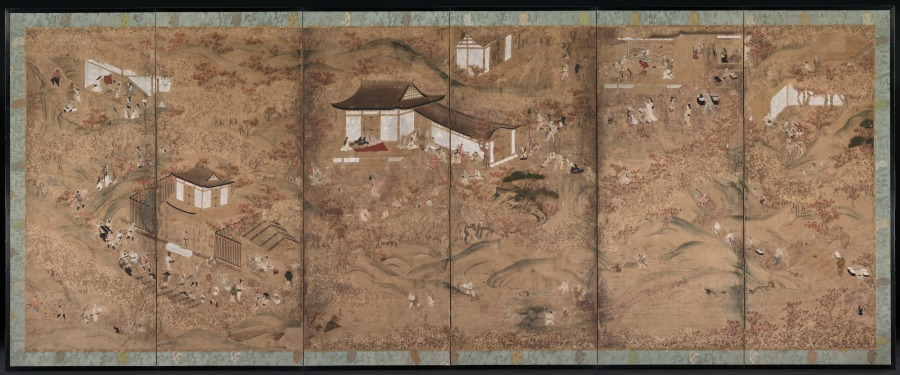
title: Autumn in the Mountains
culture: Japan, Edo period (1615–1868)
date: 1600s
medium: six-fold screen; ink and color with applied silver and gold leaf on paper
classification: Painting